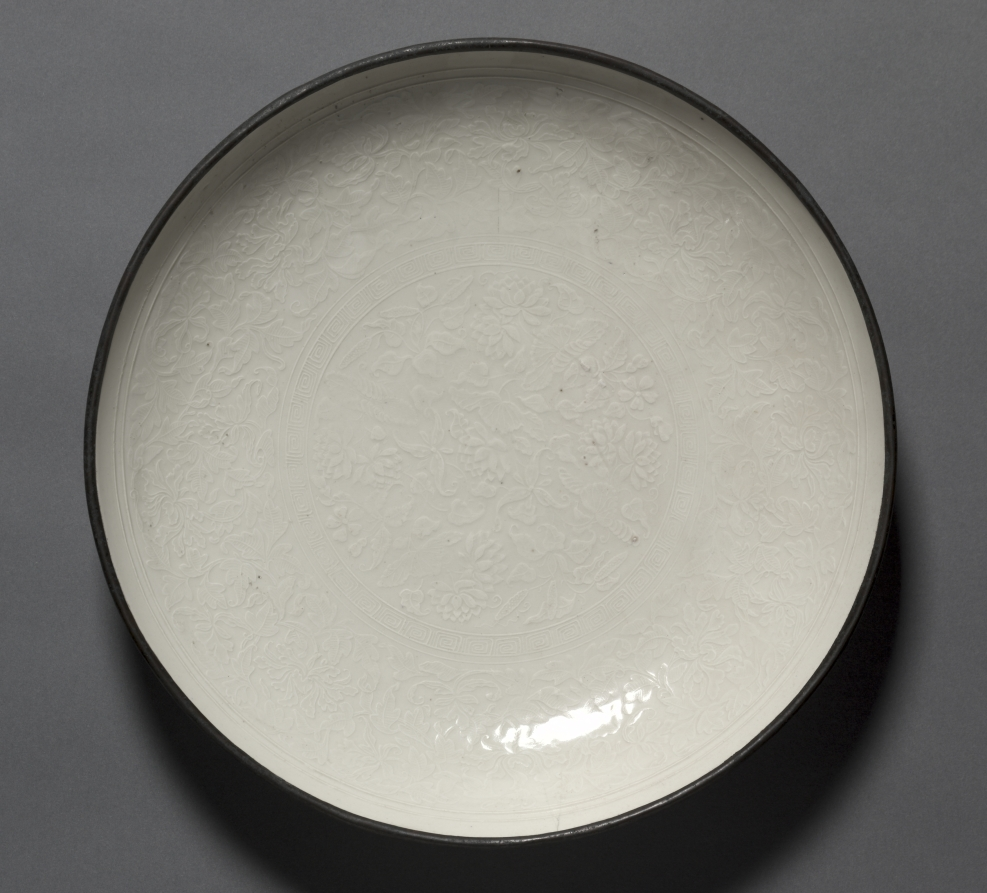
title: Dish: Ding ware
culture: China, Hebei province, Jin dynasty (1115-1234)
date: 1100s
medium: glazed grayish-white porcelain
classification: Ceramic